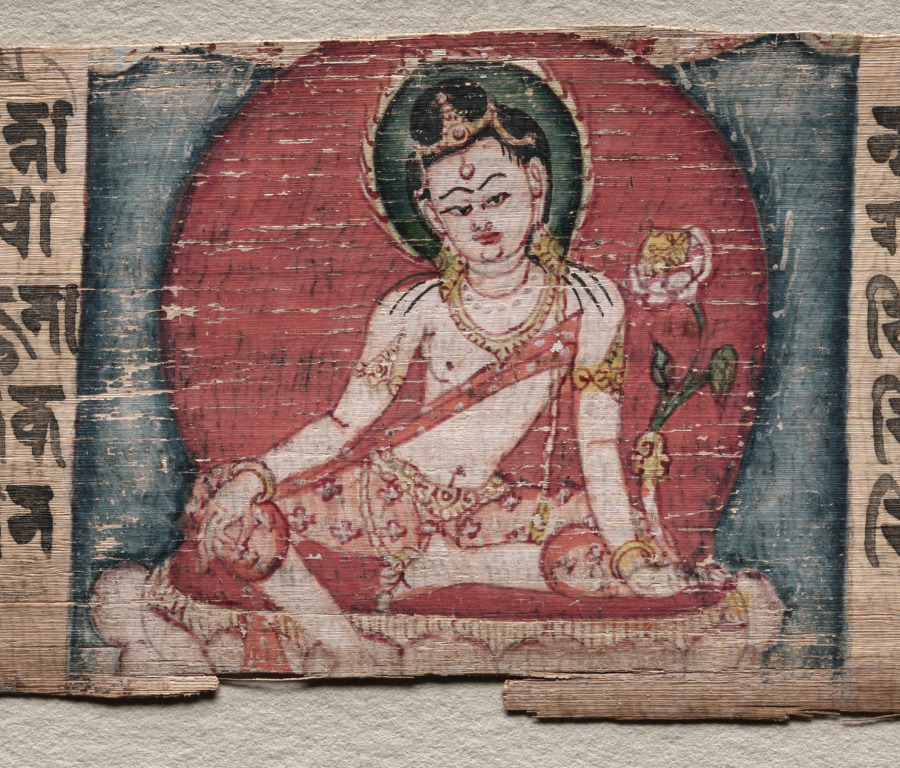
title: Bodhisattva Manjushri with two forms of Avalokiteshvara, folio 348 (recto) from a Gandavyuha-sutra (Scripture of the Supreme Array)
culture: Nepal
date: 1000–1100s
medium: gum tempera and ink on palm leaf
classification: Painting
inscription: >> dharmamukhānyavakrāntānyabhūvan nānānayaiḥ // atha khalu samantabhadro bodhisattvo mahāsattvaḥ sudhanaṃ śreṣṭhidārakametadavocat - dṛṣṭaṃ te kulaputra mama vikurvitam? āha - dṛṣṭamārya / api tu tathāgataḥ prajānan prajānīyāttāvadacintyamidaṃ vikurvitam / so 'vocat - ahaṃ kulaputra anabhilāpyānabhilāpyabuddhakṣetraparamāṇurajaḥsamān kalpān vicaritaḥ sarvajñatācittamabhilaṣamāṇaḥ / ekaikasmiṃśca mahākalpe 'nabhilāpyānabhilāpyabuddhakṣetraparamāṇurajaḥsamāstathāgatā ārāgitā bodhicittaṃ pariśodhayatā / ekaikasmiṃśca mahākalpe sarvatyāgasamāyuktāḥ sarvalokavighuṣṭā mahāyajñā yaṣṭāḥ / sarvasattvapratipādanā sarvajñatāpuṇyasaṃbhāratā / ekaikasmiṃśca mahākalpe anabhilāpyānabhilāpyabuddhakṣetraparamāṇurajaḥsamāstyāgā (Gv 426) mahātyāgāḥ kṛtāḥ, atyarthatyāgāḥ kṛtāḥ sarvajñatādharmānabhiprārthayatā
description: The Bodhisattvas of Wisdom and Compassion sit in majesty, with Manjushri in the preaching gesture in the center, being honored by two worshipers. His mandorla dances with flames, and tongues of flames encircle its border. Two different forms of Avalokiteshvara are in the flanking paintings, a two-armed and a four-armed form.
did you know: A book on a blue lotus is just over the left shoulder of the Bodhisattva of Wisdom, Manjushri.